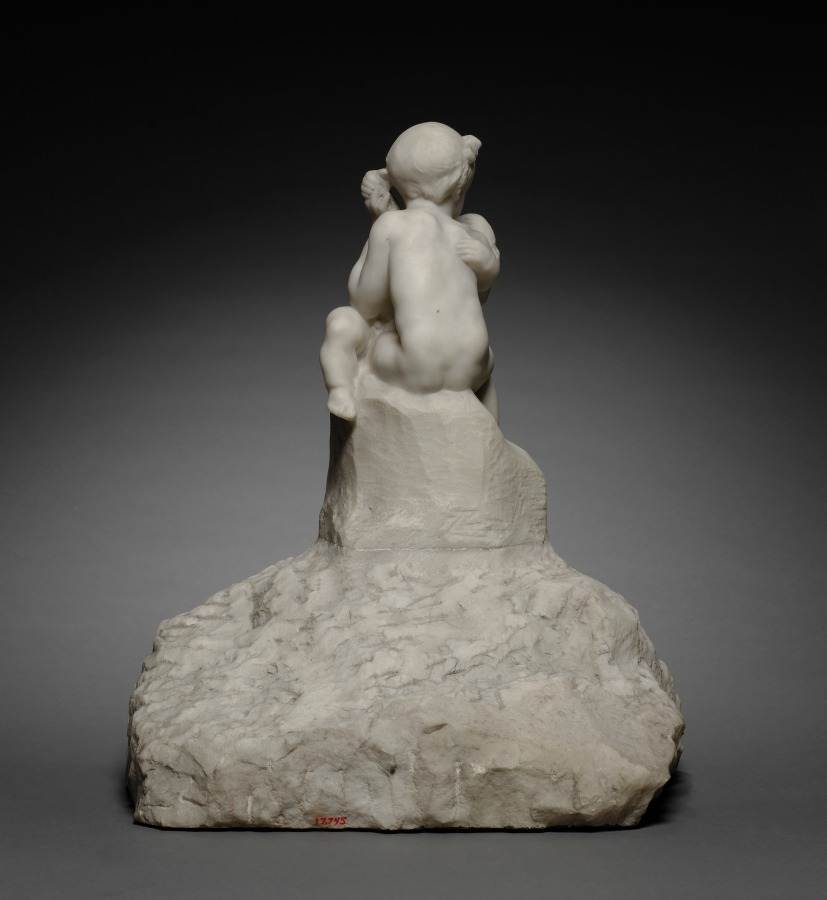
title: Little Brother and Sister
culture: France, early 20th Century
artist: Auguste Rodin (French, 1840–1917)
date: 1916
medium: marble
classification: Sculpture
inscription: Signed on base beneath figures: "A. Rodin"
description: Rodin spent years exploring new ways of representing the human emotions of love and affection experienced at different stages of life. The bodies and gestures of the children here suggest an innocent foreshadowing of the mature couple in the artist’s celebrated sculpture The Kiss of 1882. Both works feature a strong tactile contrast between the rough-hewn lower area and the smooth surfaces of the nude body above. Upwardly spiraling forms, combined with shifting areas of light and shadow, infuse the sculpture with dynamic energy.